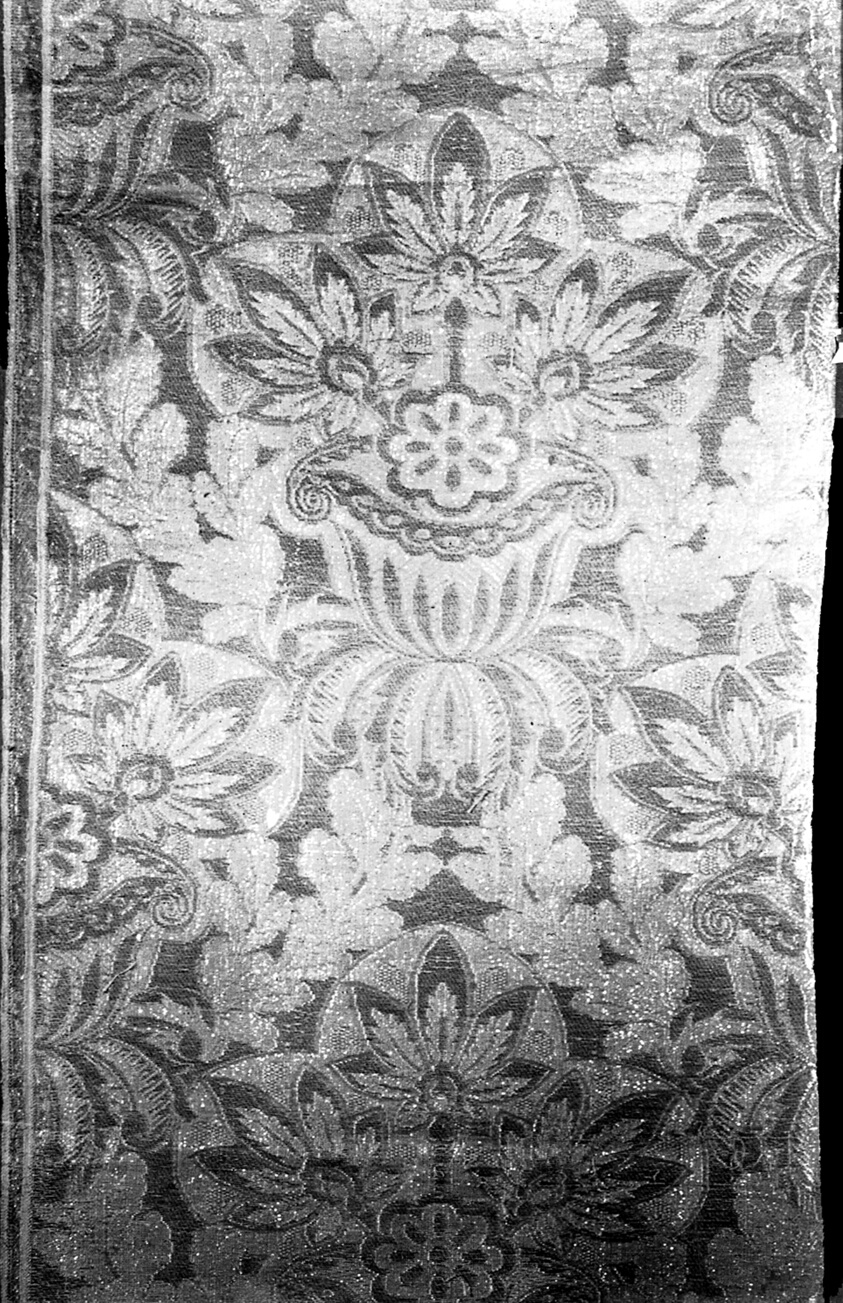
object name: Textile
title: Panel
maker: Russia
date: 1875/1900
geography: Russia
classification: textile; weaving